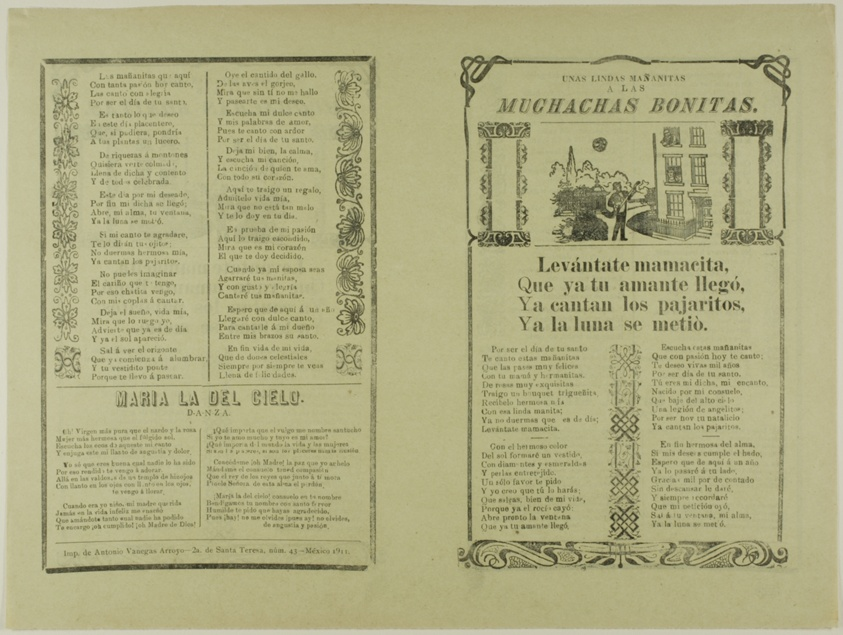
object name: Print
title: Unas lindas mañanitas a las muchachas bonitas (A Lovely Serenade for the Pretty Ladies)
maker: Attributed to José Guadalupe Posada; Mexican, 1852-1913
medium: Relief print on paper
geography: Mexico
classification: relief etching; print; prints and drawing